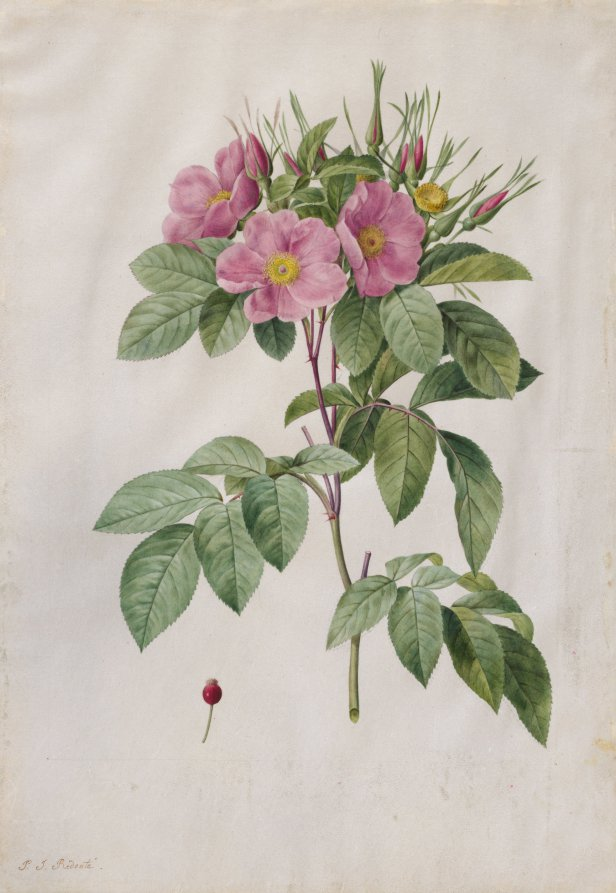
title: Pasture Rose (Rosa Carolina Corymbosa)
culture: France, 19th century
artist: Pierre-Joseph Redouté (French, 1759–1840)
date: 1817–24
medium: watercolor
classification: Drawing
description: Born in Belgium, Pierre-Joseph Redouté was trained by his father and began a ten-year career as an itinerant artist at age 13. He joined his brother in Paris working on theater sets and decorations, but his true love was flower painting, such as this drawing. Redouté achieved an international reputation for his botanical illustrations and enjoyed a long, successful career.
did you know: Pierre-Joseph Redouté's life ended at age 81, when he had a stroke while examining a lily.